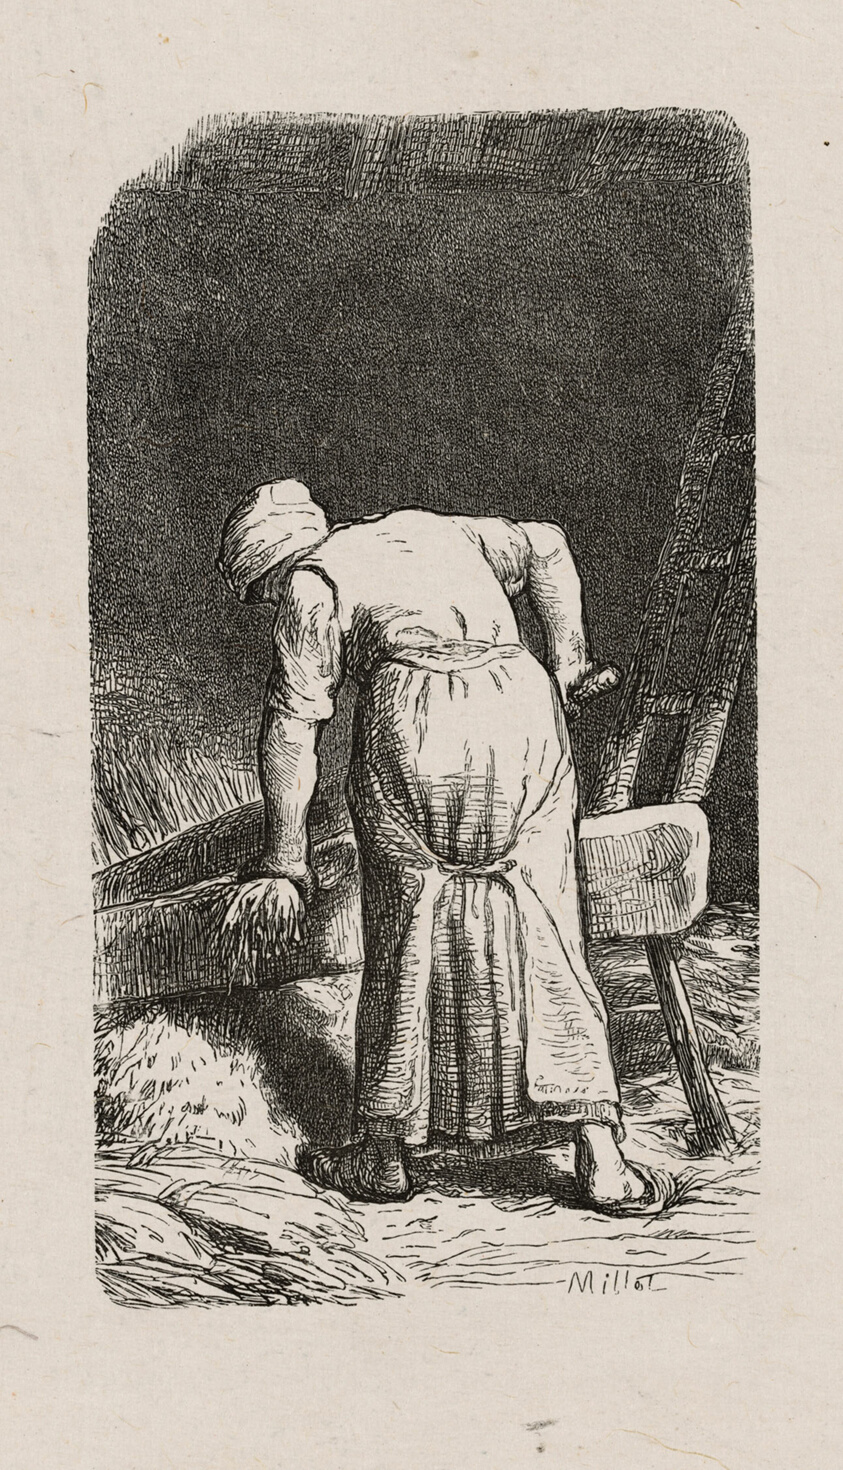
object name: Print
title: Woman Crushing Flax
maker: Jacques Adrien Lavieille (French, 1818-1862); after Jean François Millet (French, 1814-1875)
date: 1853, after drawing made in 1852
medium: Wood engraving in black on gray China paper, laid down on off-white wove paper (chine collé)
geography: France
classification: wood engraving; print; prints and drawing